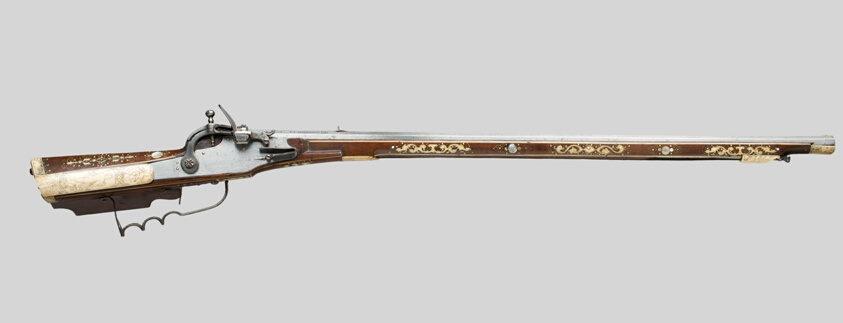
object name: Arms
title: Baltic Snaplock Rifle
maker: Polish and Swedish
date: 1610/50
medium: Steel, brass, iron, wood, horn, and mother-of-pearl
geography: Poland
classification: firearm-long gun; arms; arms and armor